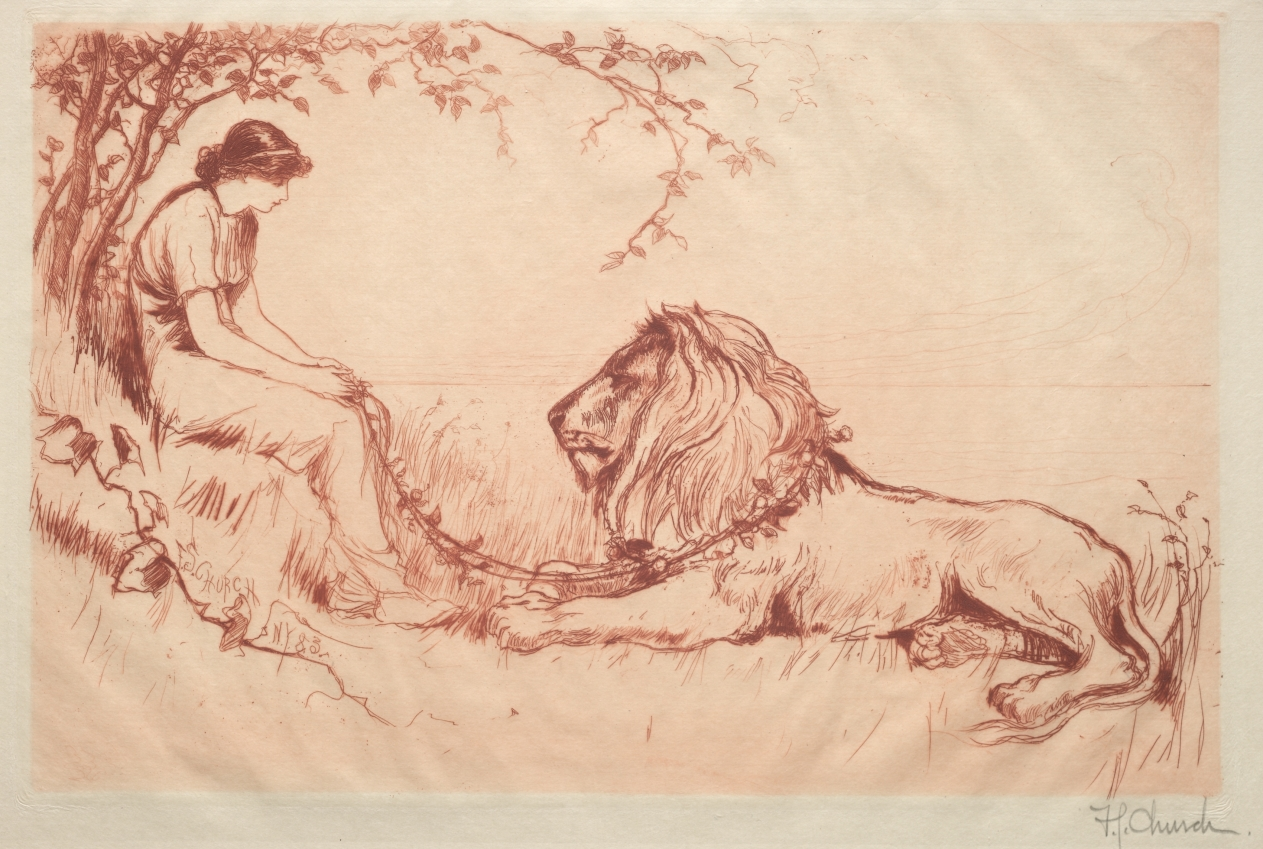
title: The Lion in Love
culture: America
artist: Frederick Stuart Church (American, 1842–1924)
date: 1883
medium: etching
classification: Print